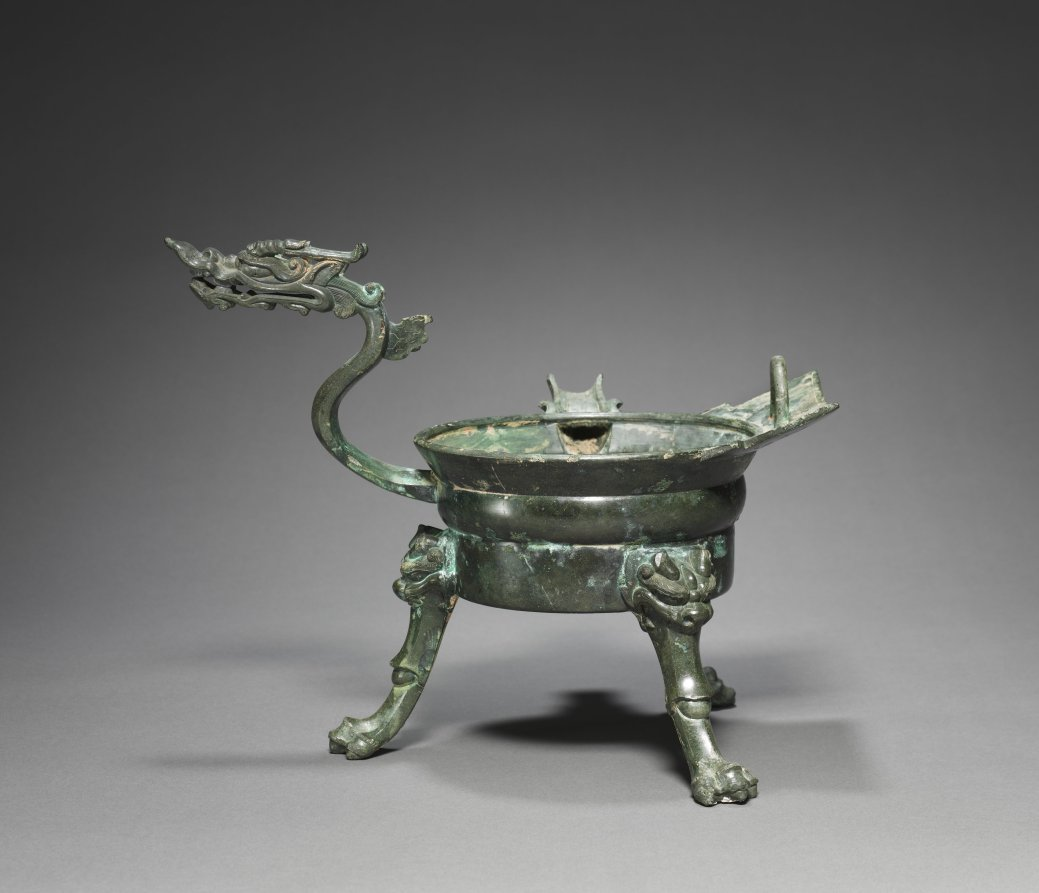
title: Tripod Container with Dragon-Head Handle (Zhadou)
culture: China, Southern and Northern Dynasties period (386-589)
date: 500s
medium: bronze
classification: Metalwork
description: This dragon, winged chimera (CMA 1980.184), and grotesque monster's face (CMA 1930.731) exhibit uninhibited imagination in the representation of fantastic animals--all are full of energy, vigor, and magical power. Whether as purely sculptural forms or decorative elements of utilitarian vessels, they are characterized by a sensitive modeling of dynamic forms with the typical Chinese elegance of line.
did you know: The tripod is supported by three splayed legs issuing from mouths of lion heads and ending in pawed feet.